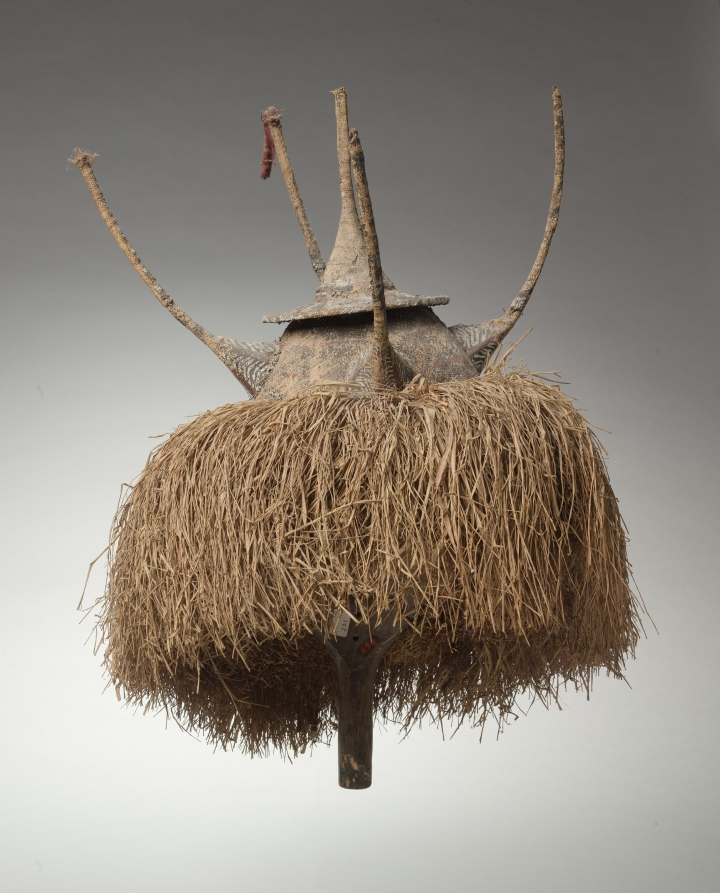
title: Mask (ndeemba)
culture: Africa, Central Africa, Democratic Republic of Congo, Yaka-style carver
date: early 1900s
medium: Wood, raffia, paint, and cotton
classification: Mask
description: This Mask (Ndeemba) has been featured prominently in the African galleries since making its debut at the Cleveland Museum of Art in 1962. Dated to the 1900s, the object is part of a group of eight masks that appear at the end of the circumcision and puberty ritual (n-khanda) for Yaka boys. It would have marked the new status of the boys who became men and commemorated their re-entry into the village. Affirming age-long tradition, such masks are worn by the master of the initiation or by the newly initiated himself.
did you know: Look under the fluffy layers of raffia fiber to see the handle; this mask was "worn" by holding it up to the face.